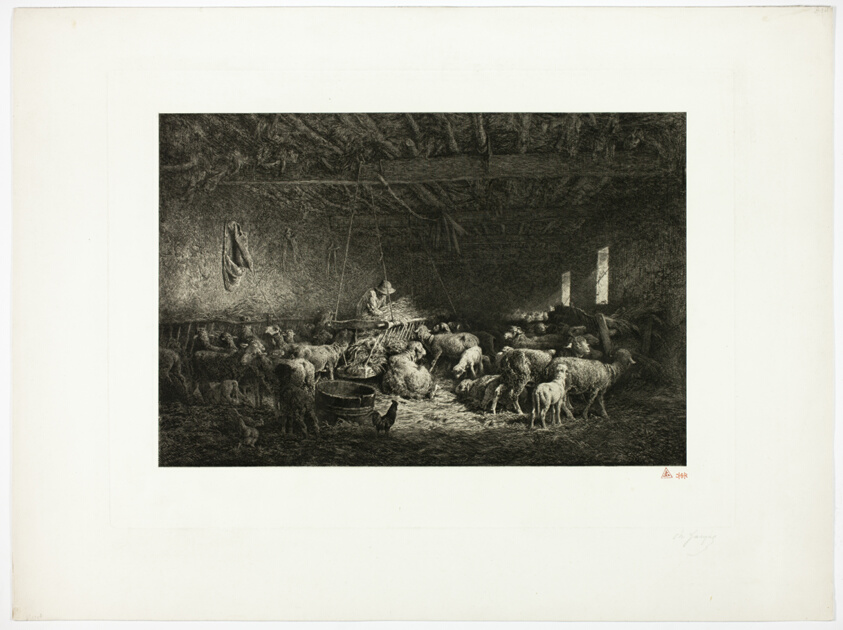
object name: Print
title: The Large Sheepcot (horizontal plate)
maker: Charles Émile Jacque (French, 1813-1894)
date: 1859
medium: Etching, engraving and drypoint on ivory wove paper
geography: France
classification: etching; print; prints and drawing